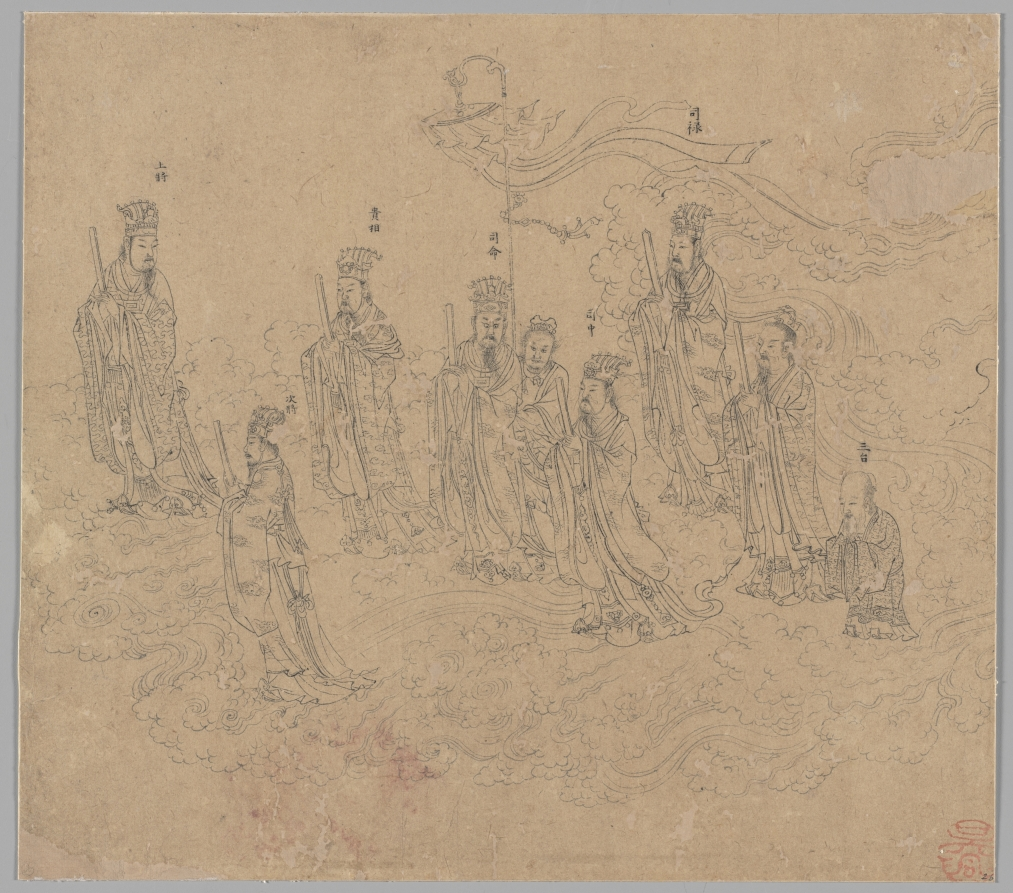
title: Album of Daoist and Buddhist Themes: Procession of Daoist Deities: Leaf 26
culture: China, Southern Song dynasty (1127-1279)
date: 1200s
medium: Album, ink on paper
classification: Painting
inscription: 三台；司錄；司中；司命；貴相；次將；上將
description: This leaf is part of an important album of 50 drawings encompassing three subjects: processions of Daoist deities to the celestial spheres, the Ten Kings of Hell, and Erlang’s Campaign to Rid Mount Guankou of Dangerous Beasts (soushan tu 搜山圖). This section of the Daoist pantheon features the six stars of the Wenchang constellation, plus two attendants and Three Ranks 三台, the short figure on the right. The Superior General 上將 stands a little aloof from the Lieutenant General 次將, Noble Minister 貴相, Director of Destiny 司命, Director of Office 司中, and Director of Emolument 司錄.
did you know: The short figure with the high forehead is the God of Longevity 壽星.